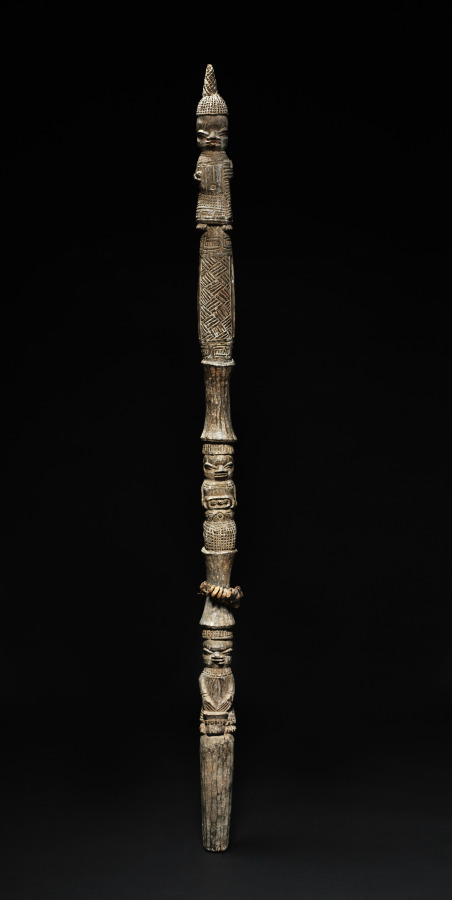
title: Rattle Staff (ukhuhre)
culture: Nigeria, Benin Kingdom, Ẹdo peoples, member(s) of the Igbesanmwan (wood and ivory carvers) guild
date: 1900s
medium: Wood, paint, cowrie shells, and plant fiber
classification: Sculpture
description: Rattle staffs (ukhuhrẹ) are instruments of memory and sound. Though this staff represented a single elite man, it evokes the individuals in his lineage. Inspired by bamboo, it is divided into segments that link three carved men dressed in coral-beaded finery. Benin courtiers still carry these staffs during celebrations and rituals. By banging the staff on the ground, a rattling sound emanates from its open center, where a wooden cylinder rolls freely. The noise alerts ancestral spirits to prayers offered on their behalf. When not in use, they are stored on ancestral altars.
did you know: Rattle staffs (ukhuhrẹ) like this are still used in the Benin Kingdom today.